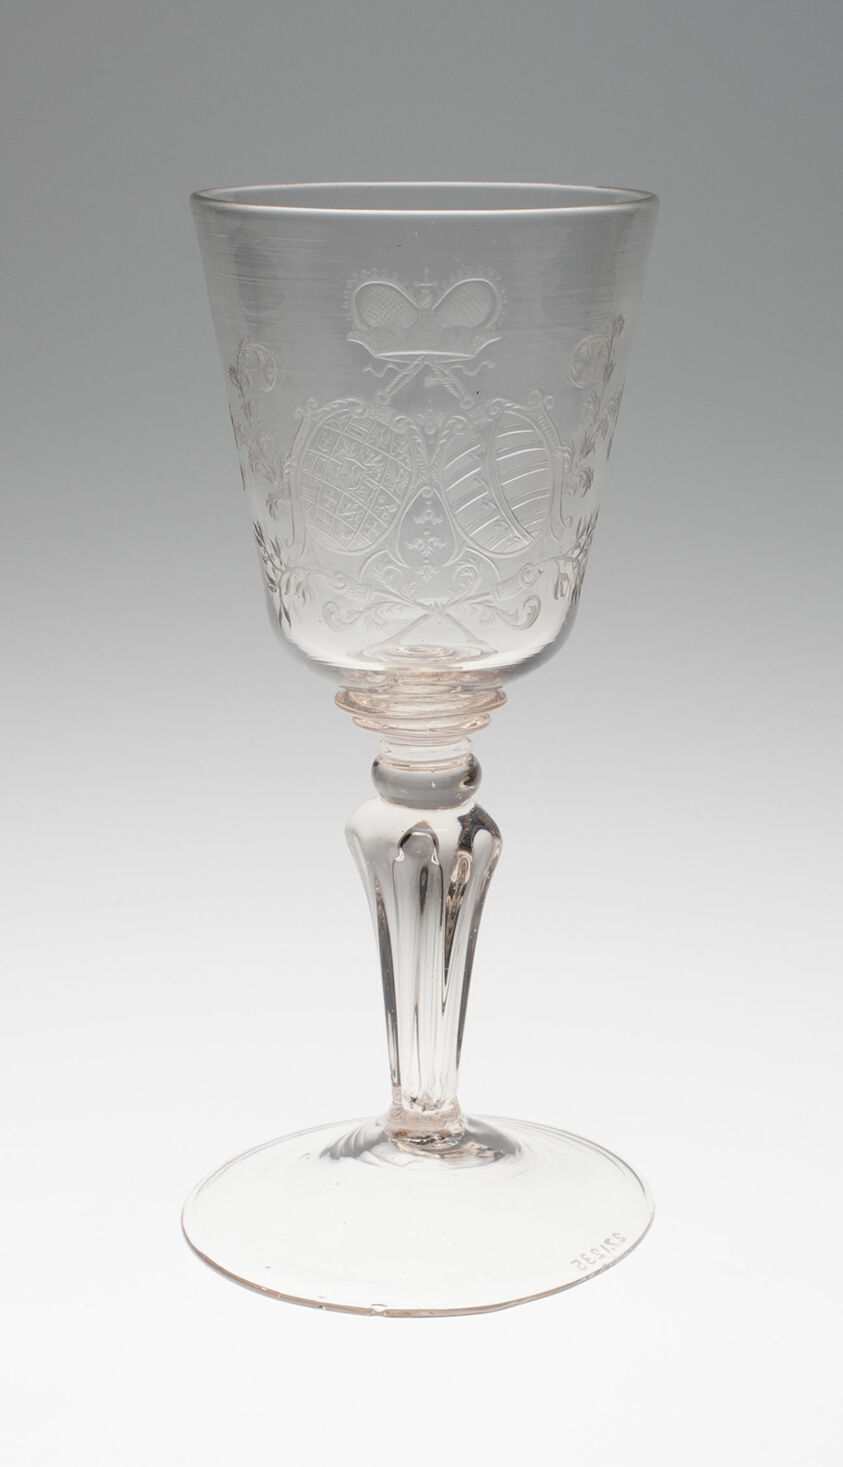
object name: Glass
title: Goblet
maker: Germany; Georg Ernst Kunckel (German, 1692-1750)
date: c. 1720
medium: Glass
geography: Germany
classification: drinking vessel; glass; european decorative arts